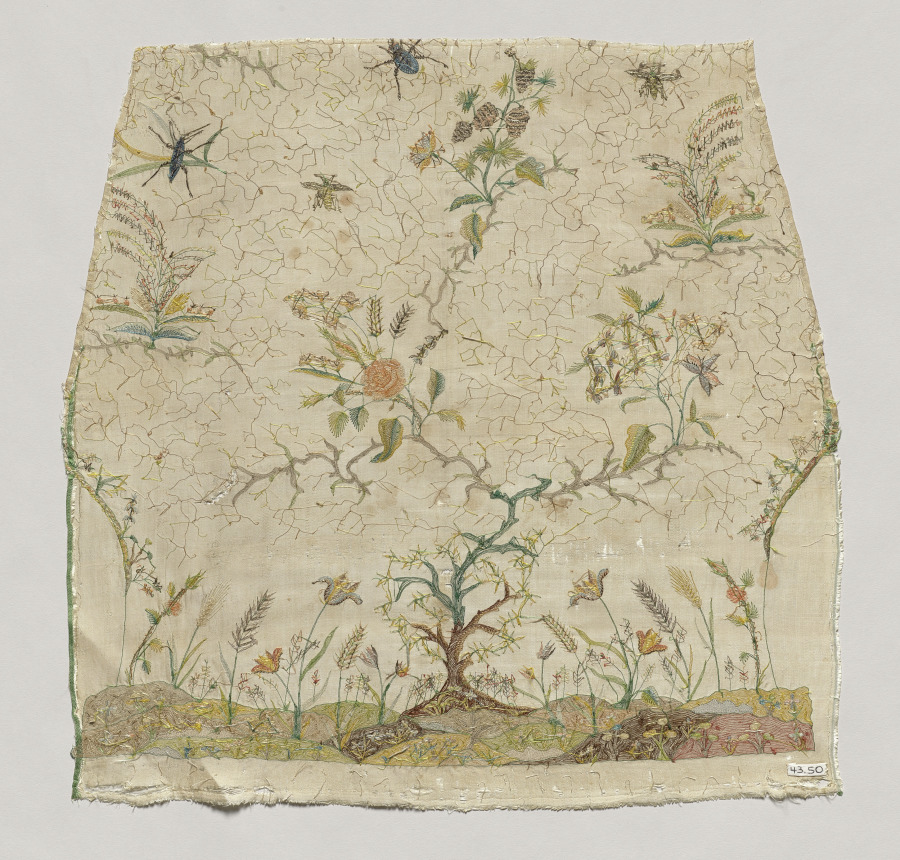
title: Fragment of a Garment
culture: India, Gujarat, 19th century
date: 1700s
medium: embroidery, silk thread on silk ground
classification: Embroidery